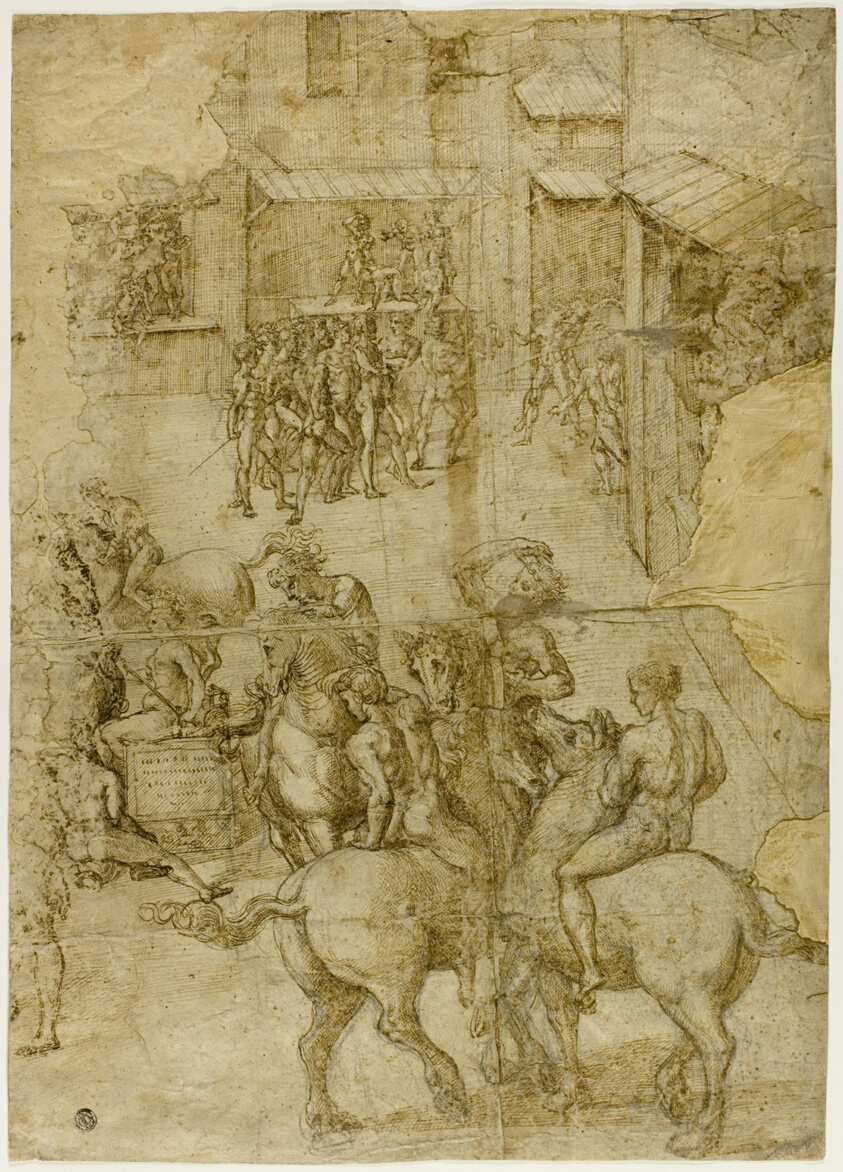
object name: Drawing and Watercolor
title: Mythological Pageant (recto); Illegible Inscriptions and Anatomical Studies of Head (verso)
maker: Girolamo Genga (Italian, c. 1476-1551)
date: 1528/29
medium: Pen and brown ink over charcoal, on ivory laid paper (recto), and pen and black ink and graphite (verso) laid down on cream laid paper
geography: Italy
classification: pen and ink drawings; drawings (visual works); prints and drawing